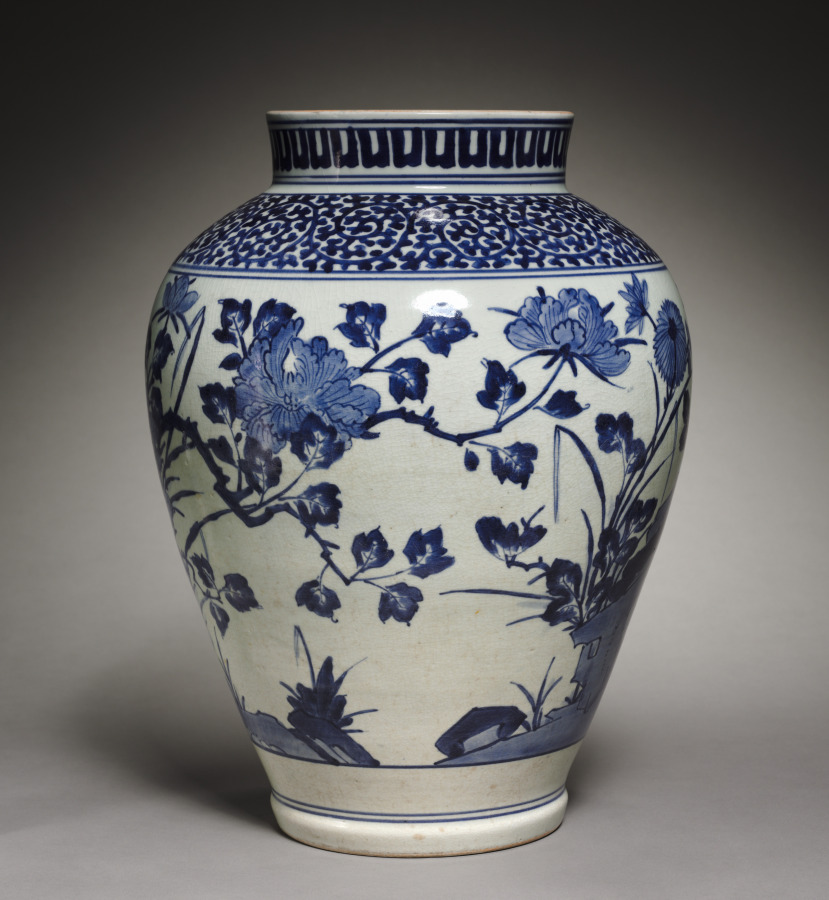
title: Large Jar with Peonies, Orchids, and Chrysanthemums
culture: Japan, Edo period (1615–1868)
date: late 1600s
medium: Porcelain with underglaze blue decoration (Imari ware)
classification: Ceramic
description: Spring peonies, summer orchids, and autumn chrysanthemums bloom at the same time amid garden rocks. These underglaze blue motifs were inspired by similar designs on Chinese ceramics made for export to Europe. In the early 1600s, Korean potters in Japan discovered kaolin, the clay essential for porcelain production. At the same time, political turmoil in China following the collapse of the Ming dynasty (1368–1644) disrupted Chinese exports. Together, these circumstances created an opportunity for Japan to supply ceramics to the European market. Careful study of Chinese prototypes shaped the work of Japanese ceramists for both domestic and overseas audiences.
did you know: This design shows the changing of the seasons: one side depicts a peony blossom in the spring, and the other side continues with chrysanthemums and an orchid in the autumn.